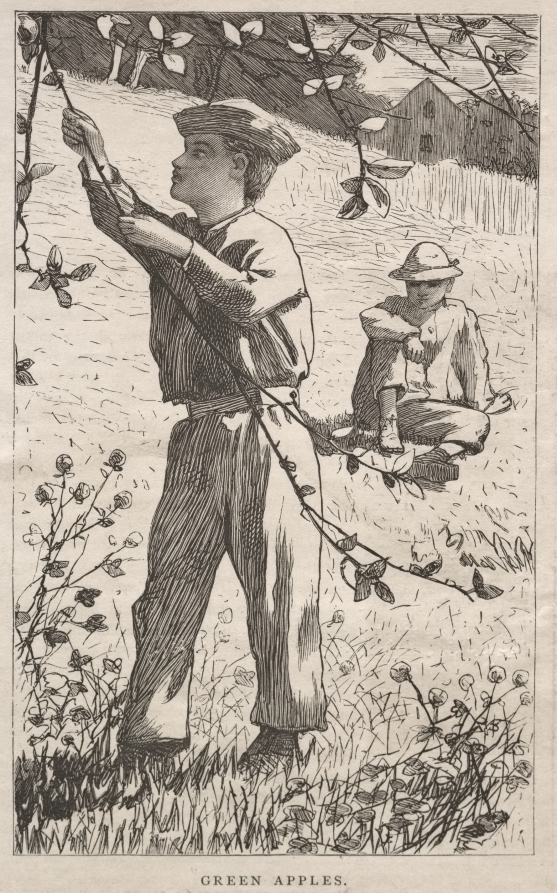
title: Green Apples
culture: America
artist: Winslow Homer (American, 1836–1910)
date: 1868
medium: wood engraving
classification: Print